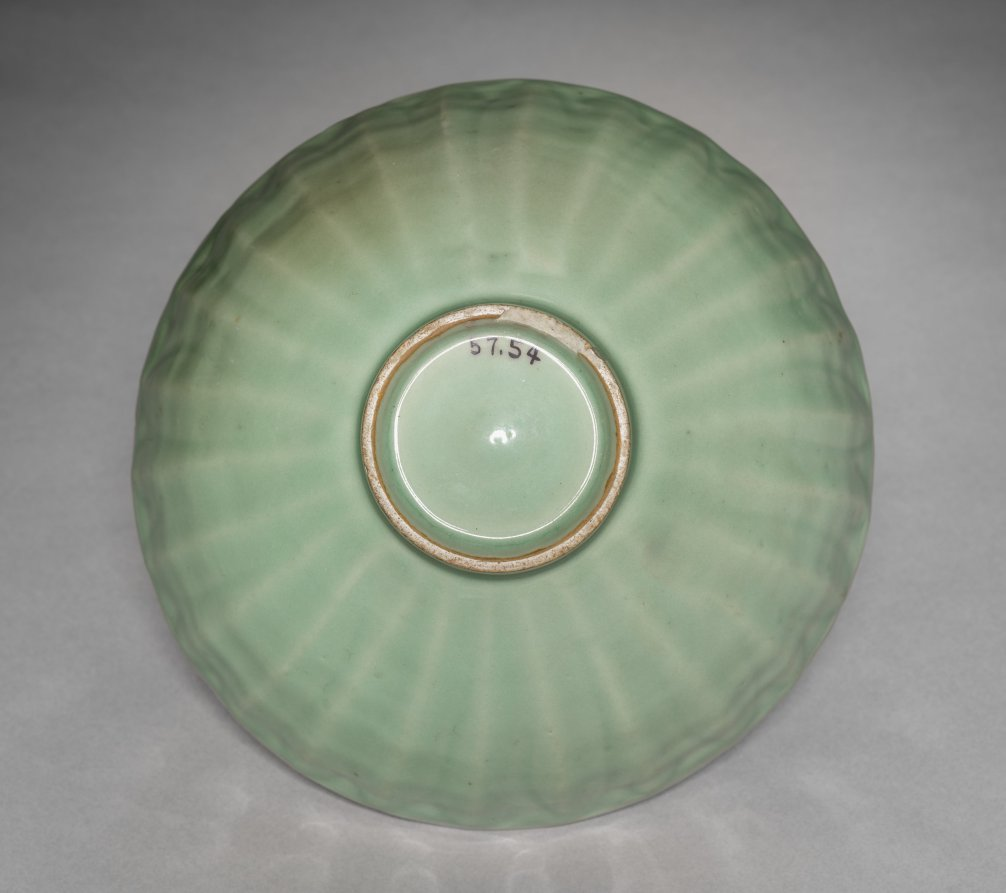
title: Lotus Bowl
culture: China, Zhejiang province, Longquan region, Southern Song dynasty (1127-1279)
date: 1200s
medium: green-glazed porcelaneous stoneware, Longquan ware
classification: Ceramic